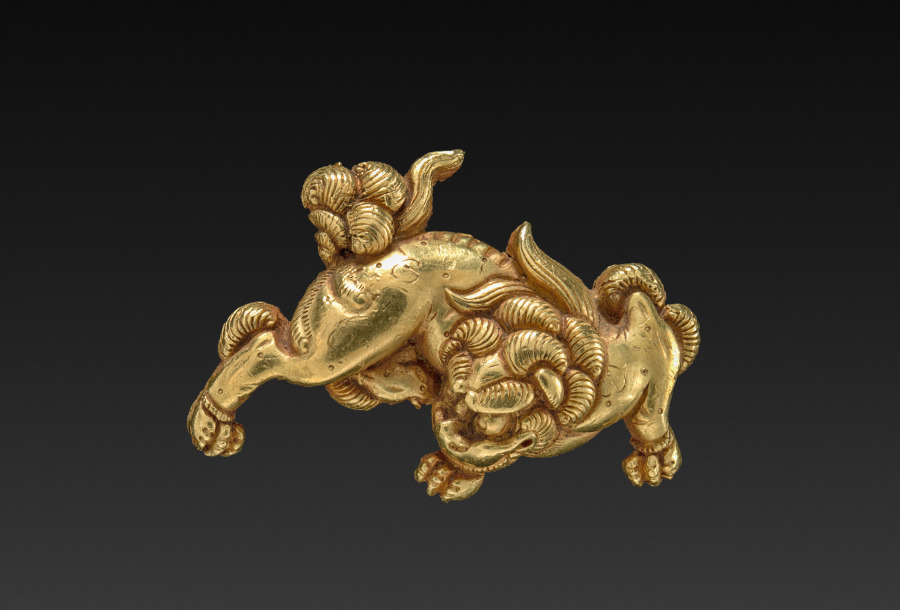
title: Lion-shaped Sword-Grip Ornament (Menuki)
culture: Japan, possibly Edo period (1615-1868)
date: c. 1615–1868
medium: gilt bronze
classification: Metalwork